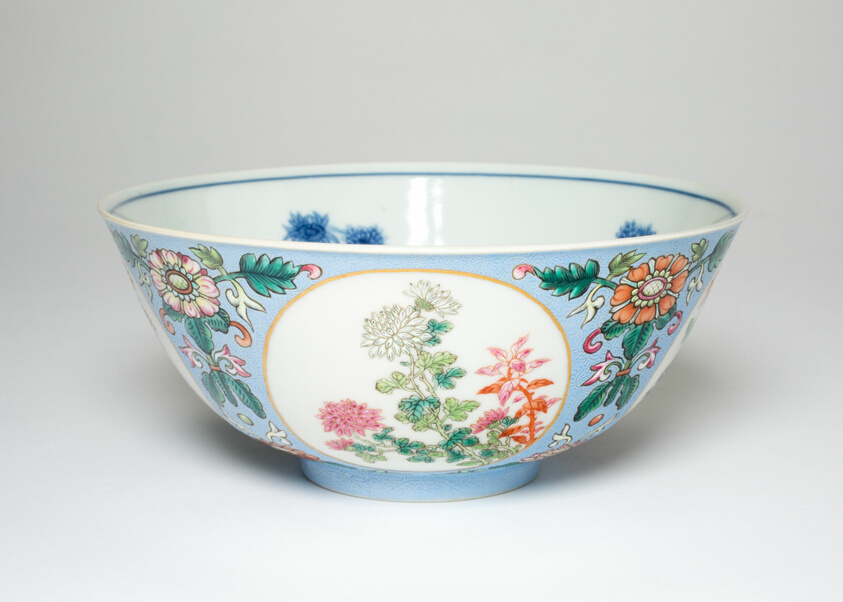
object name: Vessel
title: Bowl with Peonies and Chrysanthemums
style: Chinese (culture or style)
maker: China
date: Qing dynasty (1644–1911), Daoguang reign mark and period (1821–1850)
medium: Porcelain painted in underglaze blue and overglaze enamels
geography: China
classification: bowl; porcelain; dish (vessel); ceramics; asian art; vessel